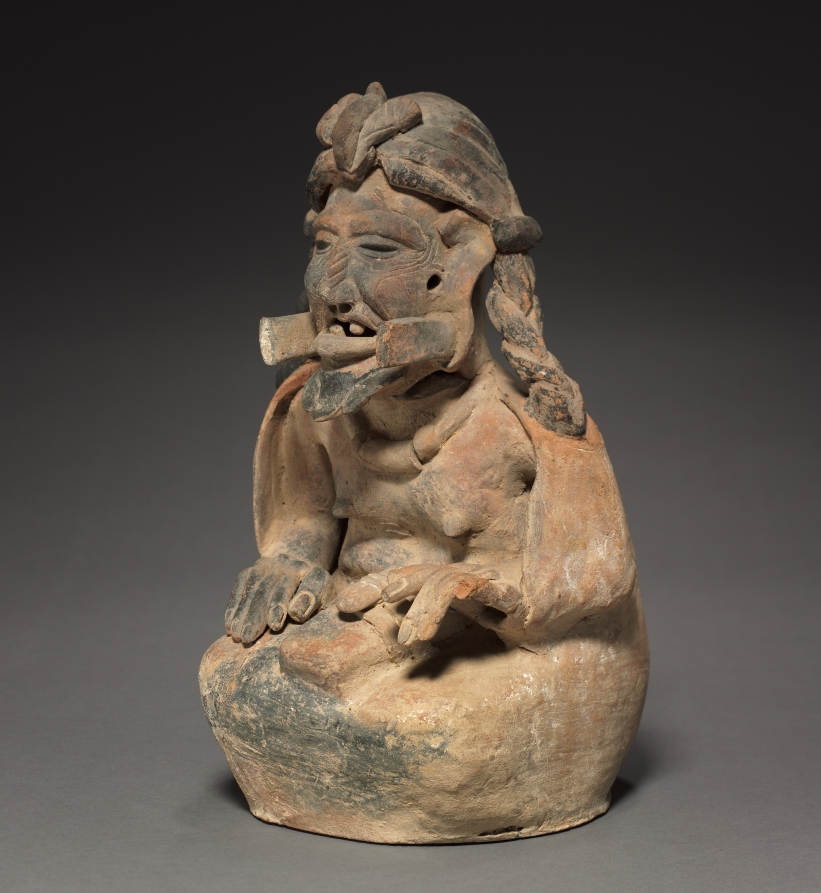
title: Elderly Figure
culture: Mexico, Campeche, Veracruz Monumental Sculpture Type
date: 600–900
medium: molded and modeled pottery with gray, tan and black paint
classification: Sculpture